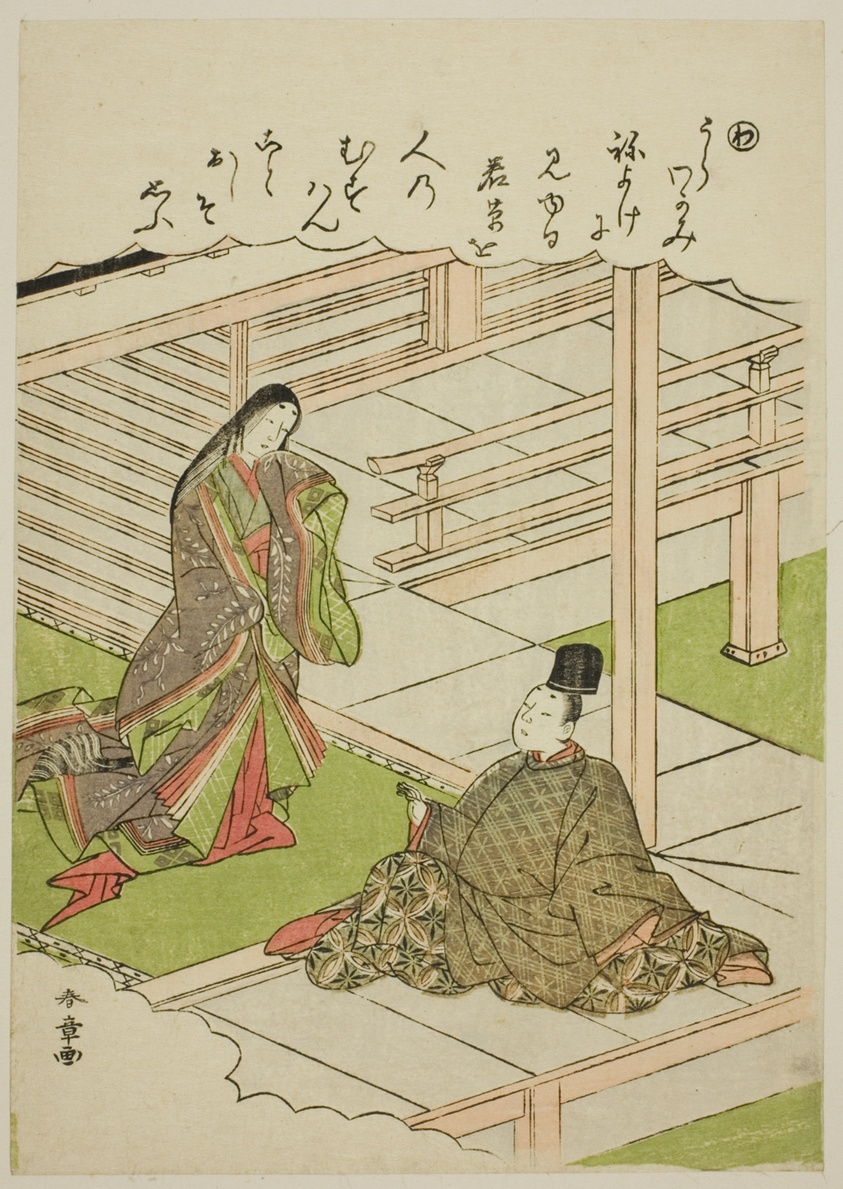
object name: Print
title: "Wa": Young Grass, from the series "Tales of Ise in Fashionable Brocade Pictures (Furyu nishiki-e Ise monogatari)"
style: Japanese (culture or style)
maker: Katsukawa Shunsho 勝川 春章; Japanese, 1726-1792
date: c. 1772/73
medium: Color woodblock print; koban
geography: Japan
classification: woodblock print; print; asian art